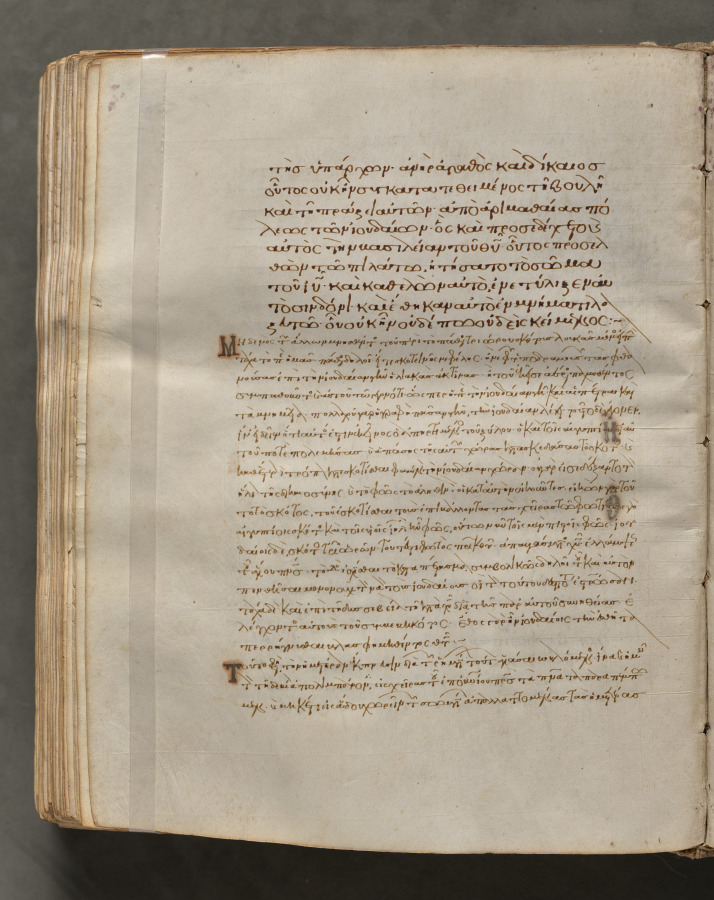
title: Text, folio 317 (verso), from a Gospel Book with Commentaries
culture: Byzantium, Constantinople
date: c. 1000–1100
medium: ink, tempera, and gold on vellum; leather binding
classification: Bound Volume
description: Each of the four gospels in this book opens on a page with brilliantly illuminated borders depicting the author of the text as well as birds—principally peacocks, symbols of the immortality of the soul—and fountains, representing the fountain of life and the salvation of the soul. This volume consists of 428 leaves with texts in Greek. Its level of sophistication suggests that it was probably written and decorated in a monastery in Constantinople.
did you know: Gospel books were carried in procession through Byzantine churches.